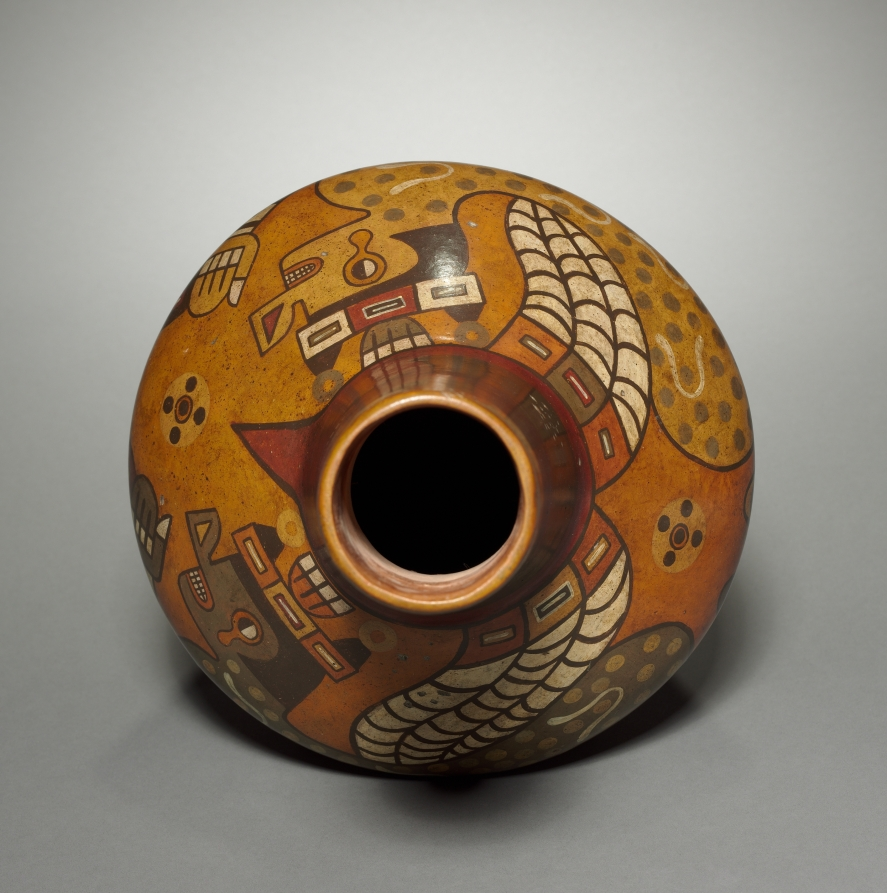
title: Vessel (modern version of a Wari-style vessel)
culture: Peru, modern, 20th century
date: before 1955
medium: pottery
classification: Forgery